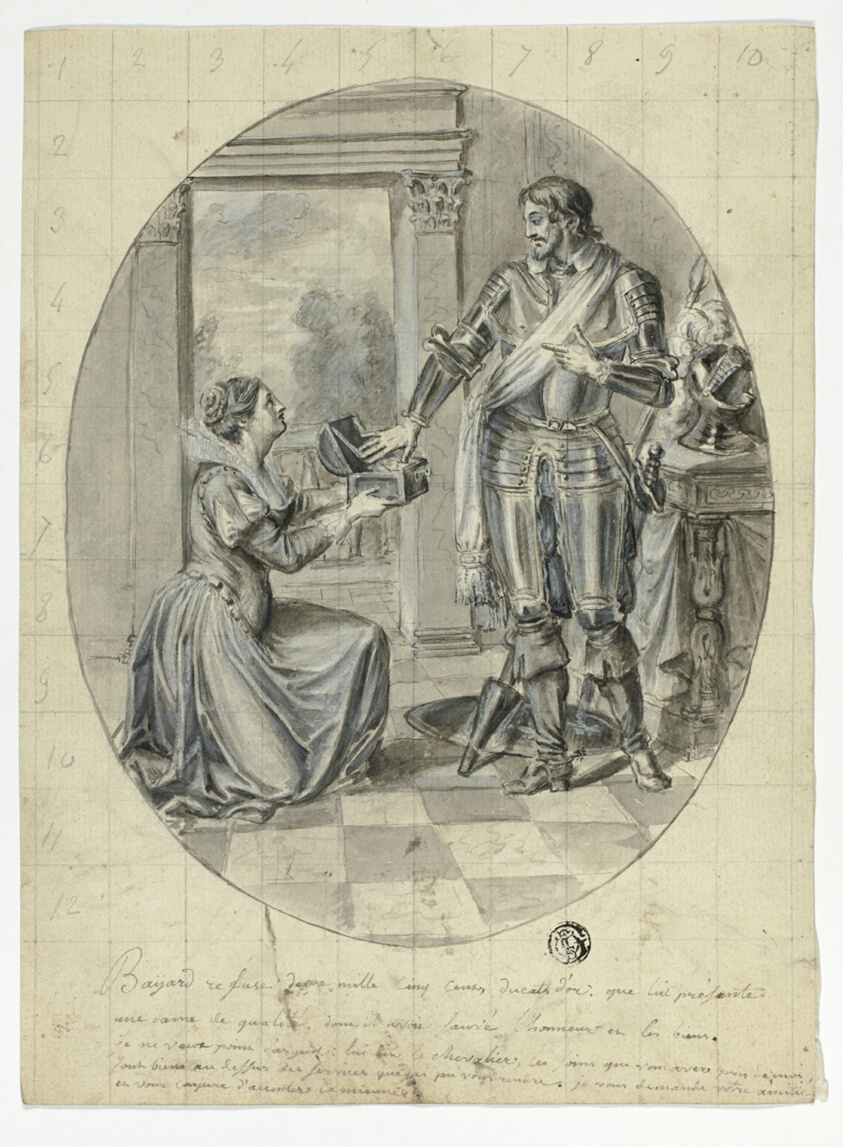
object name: Drawing and Watercolor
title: The Chevalier Bayard Refusing 2500 Ducats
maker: Unknown Artist; European, n.d.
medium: Pen and black ink, with brush and gray wash, heightened with white gouache, on cream laid paper, squared with graphite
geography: Europe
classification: ink or chalk wash; drawings (visual works); prints and drawing